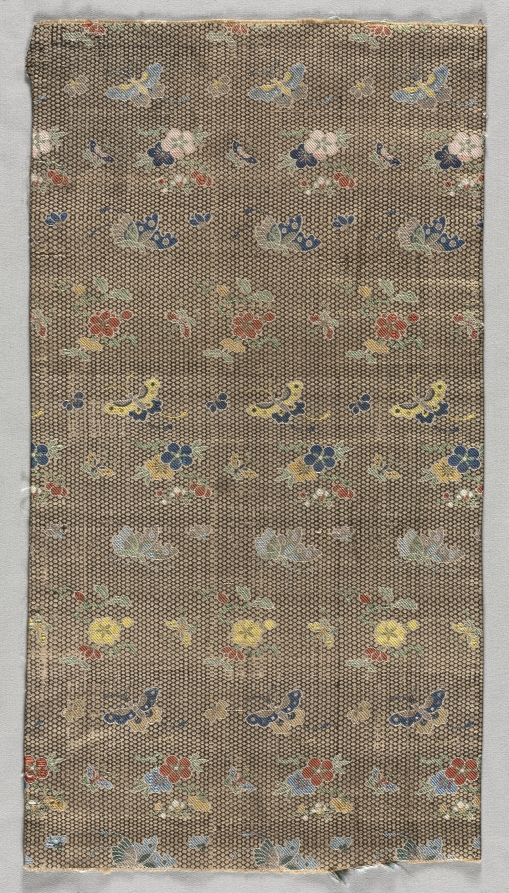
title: Fragment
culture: China, 19th century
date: 1800s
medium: silk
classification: Textile